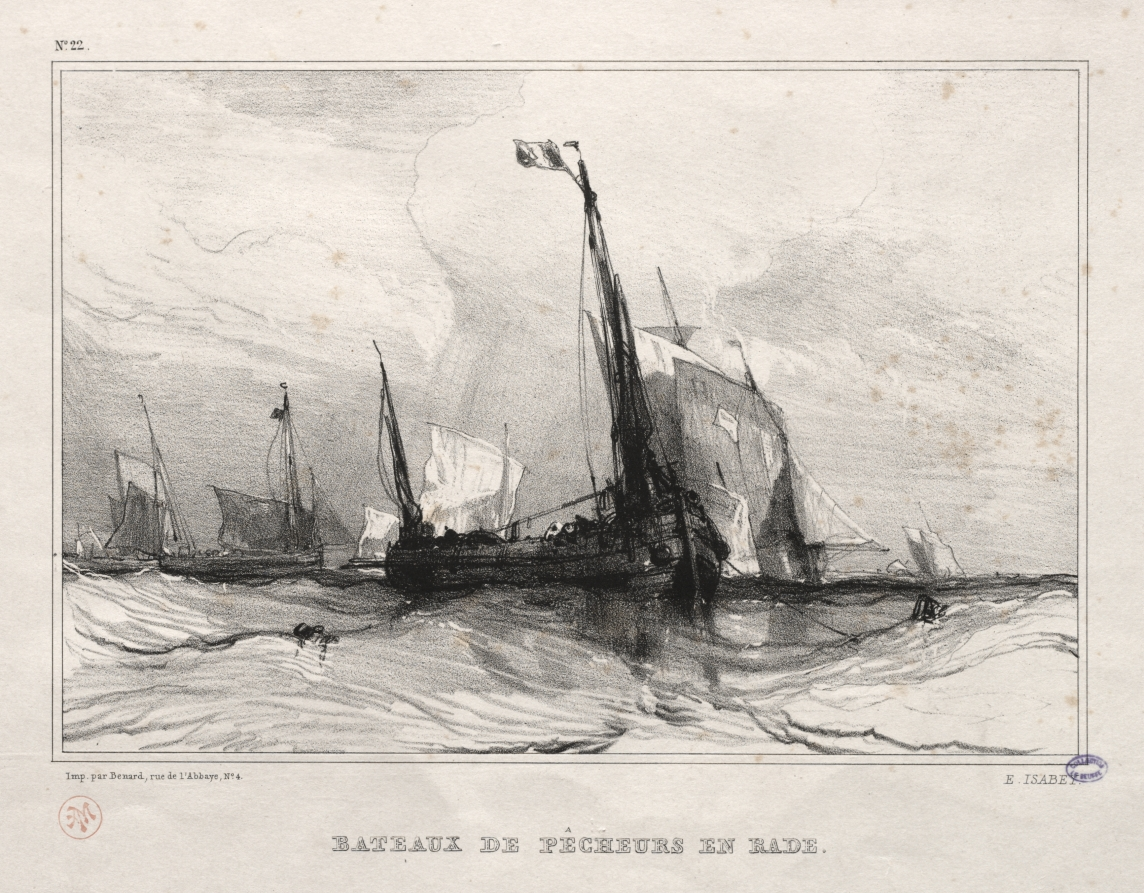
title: Fishing Boats at Anchor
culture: France, 19th century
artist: Eugène Isabey (French, 1803–1886)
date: 1836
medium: lithograph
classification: Print